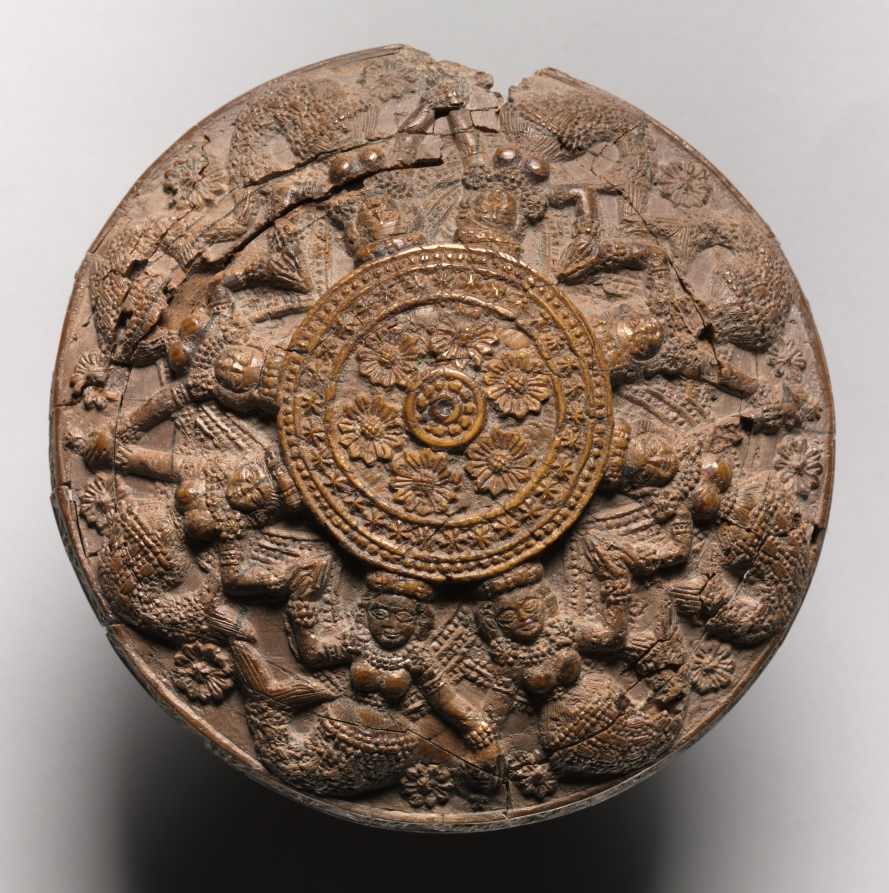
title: Roundel with Mermaids and Lotus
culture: India, Bengal, Chandraketugarh area, Shunga period (185–78 BCE)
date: c. 100 BCE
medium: ivory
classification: Ivory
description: This ivory disk was possibly part of a massive earring around which lobes were stretched so that they rest on the shoulders. Eight figures that are half woman and half fish hold hands in a ring around a series of concentric circles containing floral imagery. Their hands and tails make the repeated form of an auspicious trident-shaped symbol, often depicted with fish tails in combination with a lotus flower. The full-breasted forms, the tails, and the lotus flowers evoke the imagery of life-giving waters. A circle of eight female figures later comes to refer to the maidens of the eight directions of the sky (ashtadikpalikas).